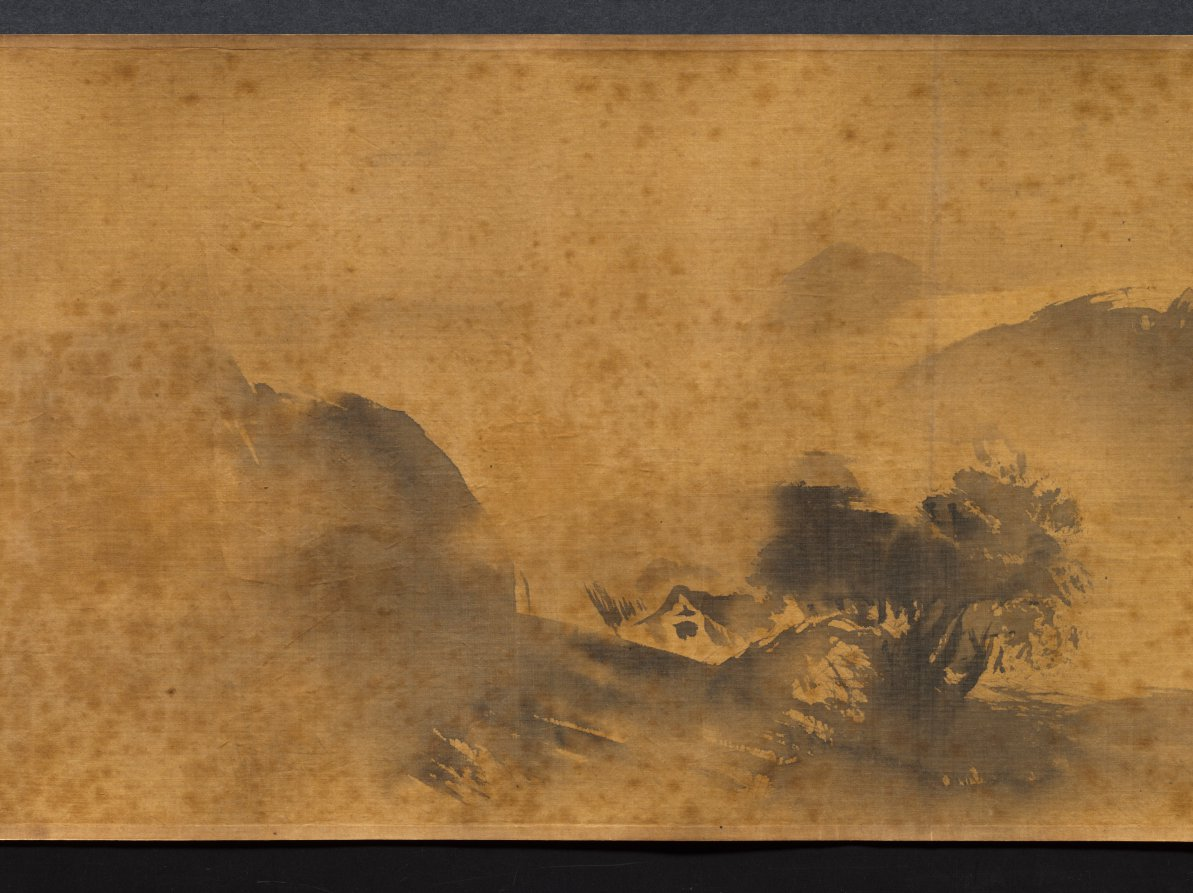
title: Eight Views of Xiao-Xiang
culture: Japan, Edo period (1615–1868)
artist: Kano Tan’yū (Japanese, 1602–1674)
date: 1615–1868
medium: handscroll; ink on silk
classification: Painting